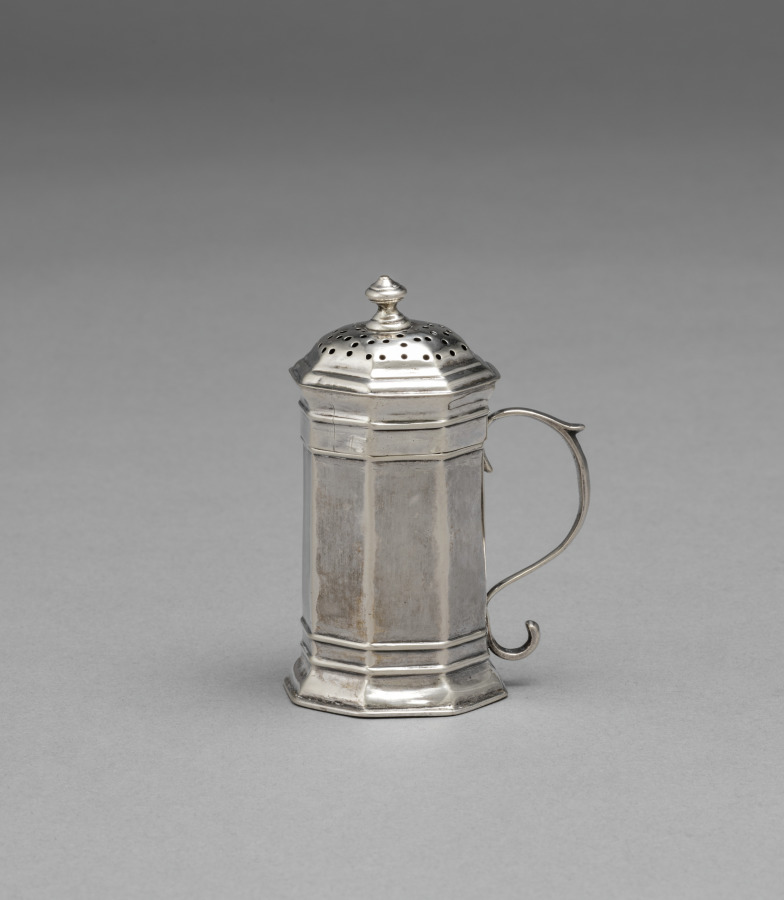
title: Caster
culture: America, Massachusetts, Boston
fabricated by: John Burt (American, 1693–1746)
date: c. 1735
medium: silver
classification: Silver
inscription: engraved "John Basset" in block capital letters and script lower-case letters and "M*B" on bottom.